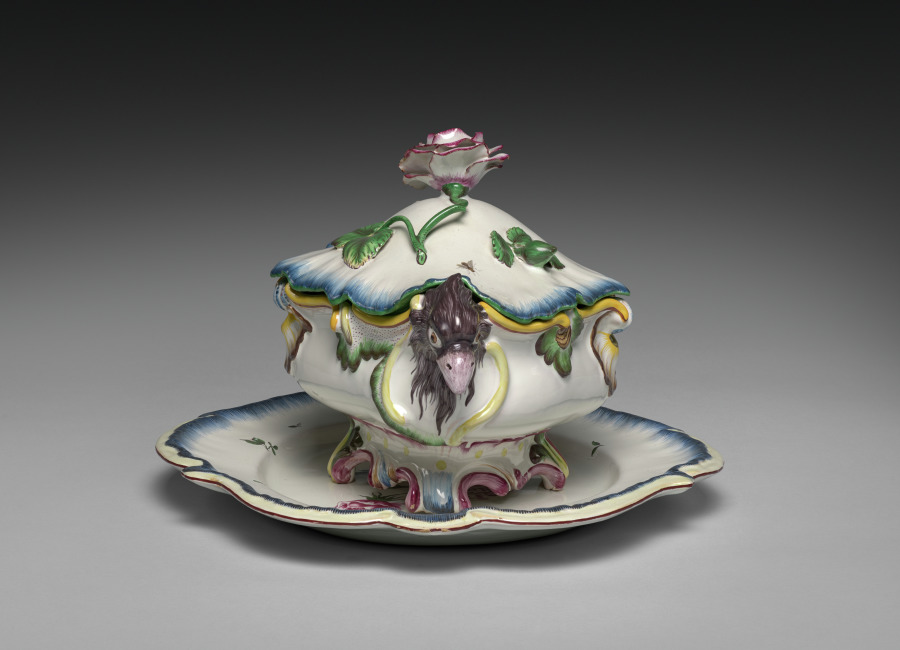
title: Covered Tureen on Stand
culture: France, Strasbourg, 18th century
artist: Strasbourg Factory (France)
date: c. 1750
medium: tin-glazed earthenware (faience) with enamel decoration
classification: Ceramic